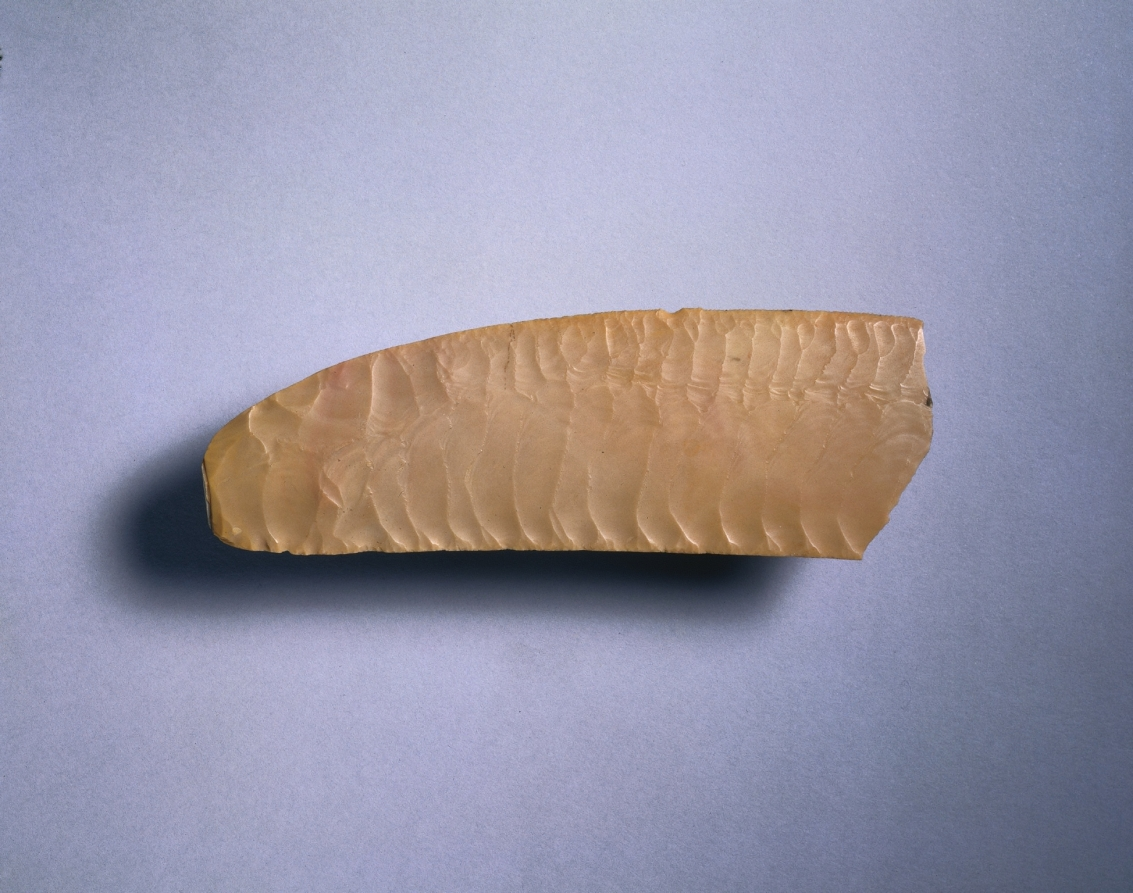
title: Ripple-Flaked Knife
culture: Egypt, Haraga, cemetery G, tomb 413, excavated in 1914, Predynastic (5000–2950 BCE), Naqada IIc–IIId (3650–3000 BCE)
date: 4000–3000 BCE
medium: flint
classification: Implements